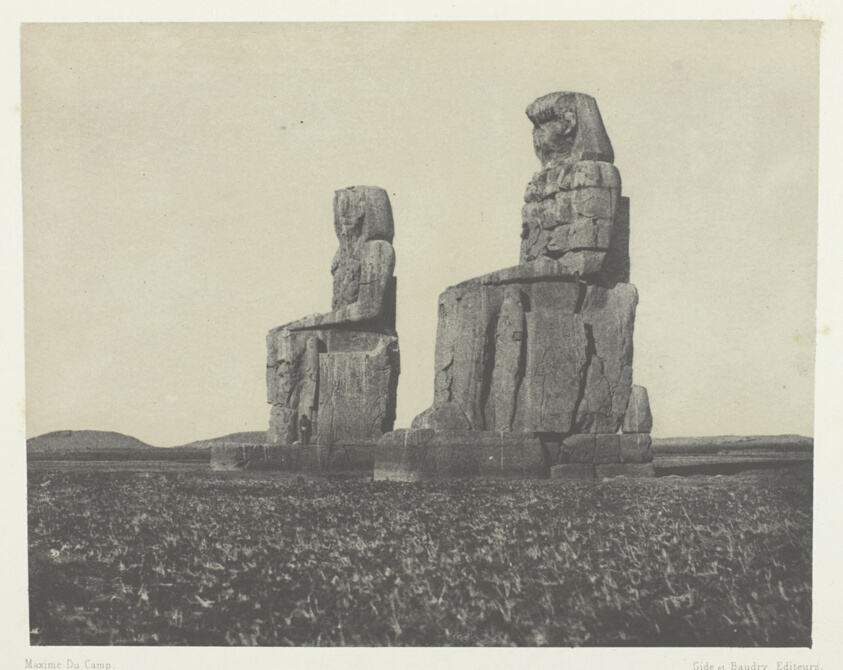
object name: Photograph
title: Gournah, Les Colosses; Thèbes, plate 54 from the album "Egypte, Nubie, Palestine et Syrie" (1852)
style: 19th century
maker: Maxime Du Camp (French, 1822–1894); printed by the Imprimerie Photographique de Blanquart-Evrard (French, founded 1851)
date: 1849/51, printed 1852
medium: Salted paper print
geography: France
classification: salted paper print; photographic process; photography; photograph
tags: Collected by Hugh Edwards, Egypte, Nubie, Palestine et Syrie